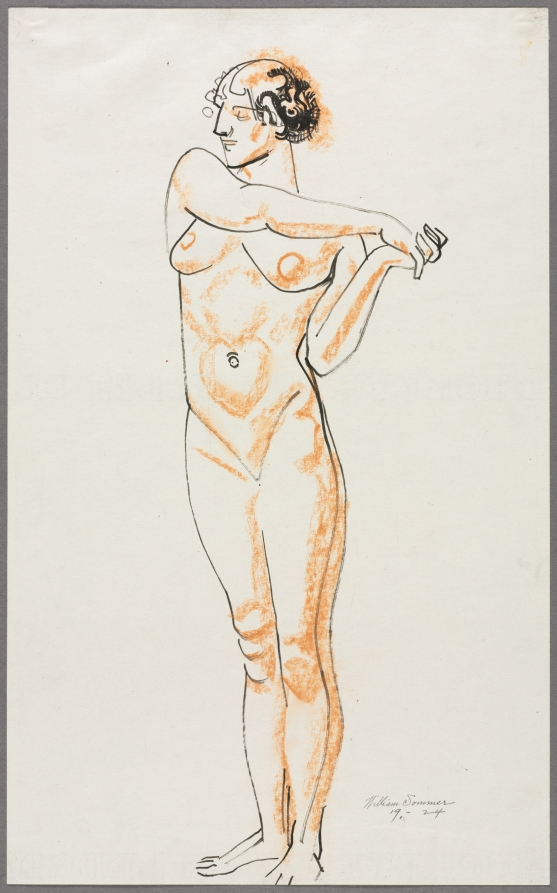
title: Female Nude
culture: America, Ohio, Cleveland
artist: William Sommer (American, 1867–1949)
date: 1924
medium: sanguine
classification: Drawing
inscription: In graphite, lower right corner: "William Sommer 19-24"